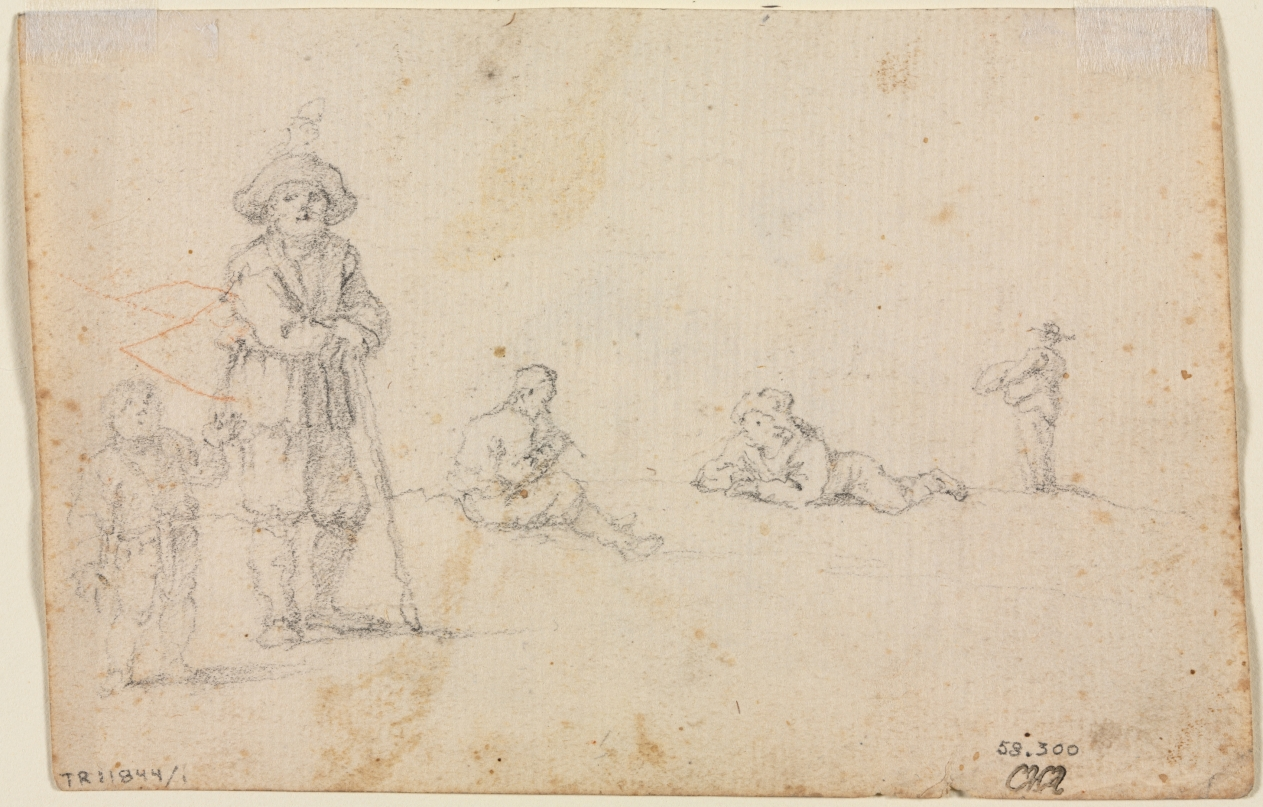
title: Five Figure Studies (verso)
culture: France, 17th century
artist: Anonymous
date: 1600s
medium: graphite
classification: Drawing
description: In September 1883 Van Gogh left the bustling Dutch city of The Hague in search of open countryside in which to paint. He moved to Drenthe, a village in northeastern Netherlands that was virtually untouched by the Industrial Revolution. He described the barren terrain as supremely beautiful and serene: "What tranquility, what expanse, what calmness in this nature." With a limited palette of steely greens and cool blues, Van Gogh masterfully portrayed one of the region’s expanses of heath—"a vast plane vanishing into infinity"—illuminated by the lilac hues of the evening sky.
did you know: Vincent van Gogh made this watercolor just over a year after beginning to work professionally as an artist.